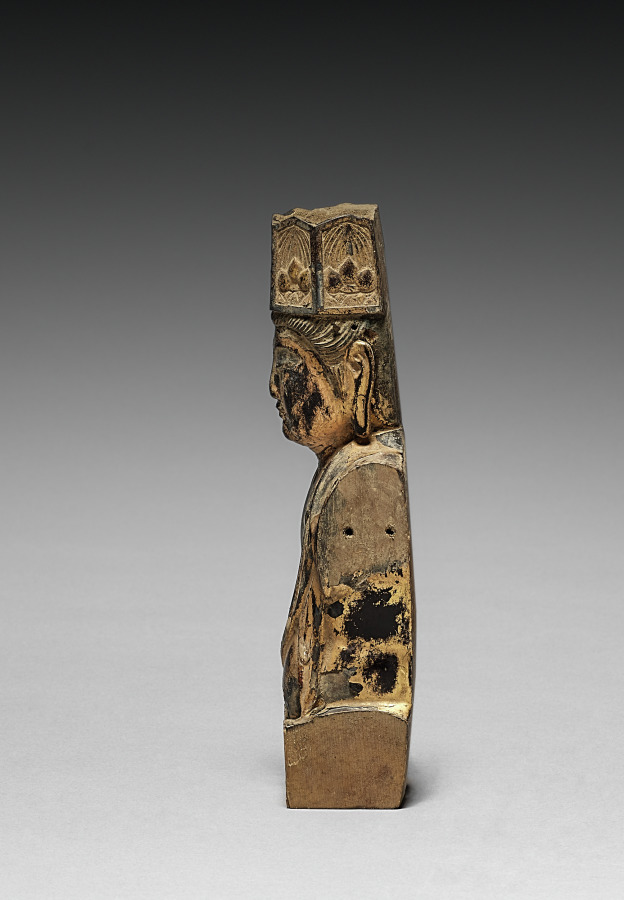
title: Bodhisattva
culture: Japan, Heian period (794–1185)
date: 900s-1100s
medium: gilded wood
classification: Sculpture